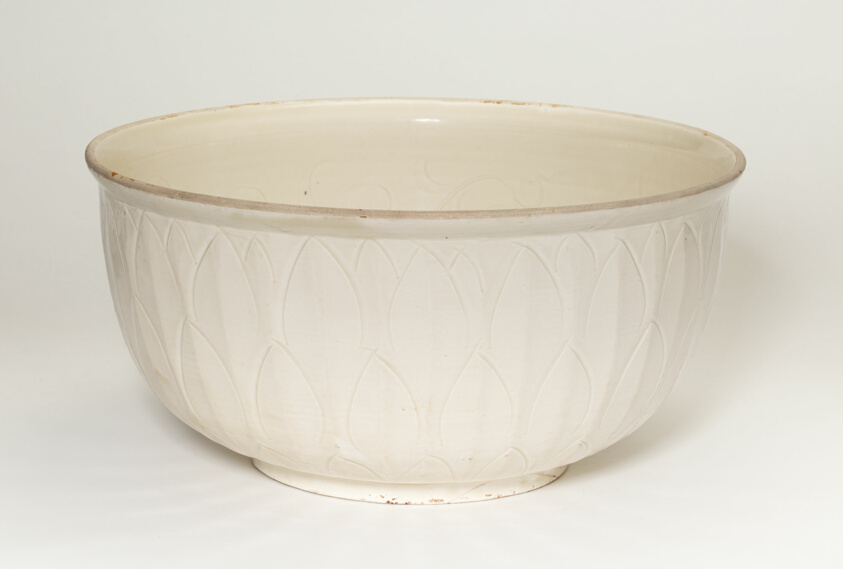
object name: Vessel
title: Large Bowl with Lotus Scrolls (interior) and Overlapping Petals (exterior)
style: Chinese (culture or style)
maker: China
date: Northern Song dynasty (960–1127), early 12th century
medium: Ding ware; porcelain with underglaze carved decoration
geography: China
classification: bowl; porcelain; dish (vessel); asian art; ceramics; vessel